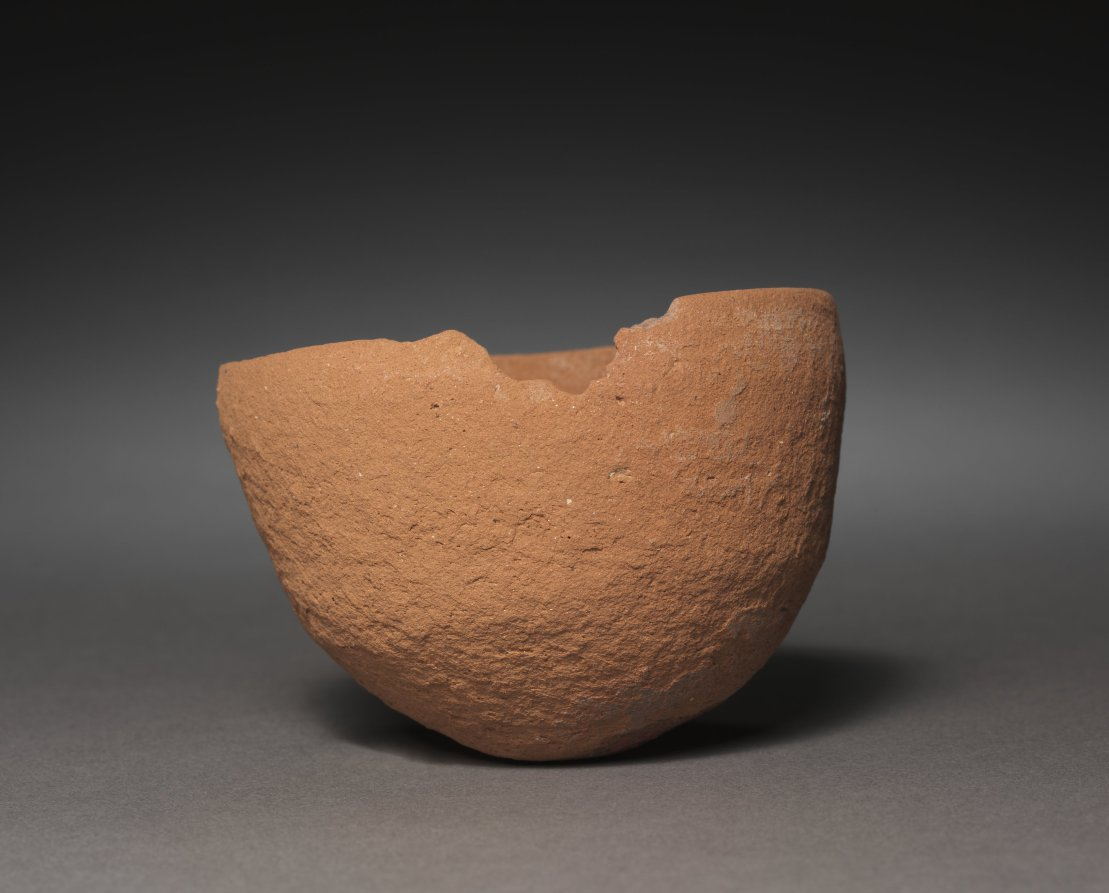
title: Drinking Cup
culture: Egypt, Middle Kingdom (2040–1648 BCE), Dynasty 12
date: 1980–1801 BCE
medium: Nile silt ware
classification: Vessels